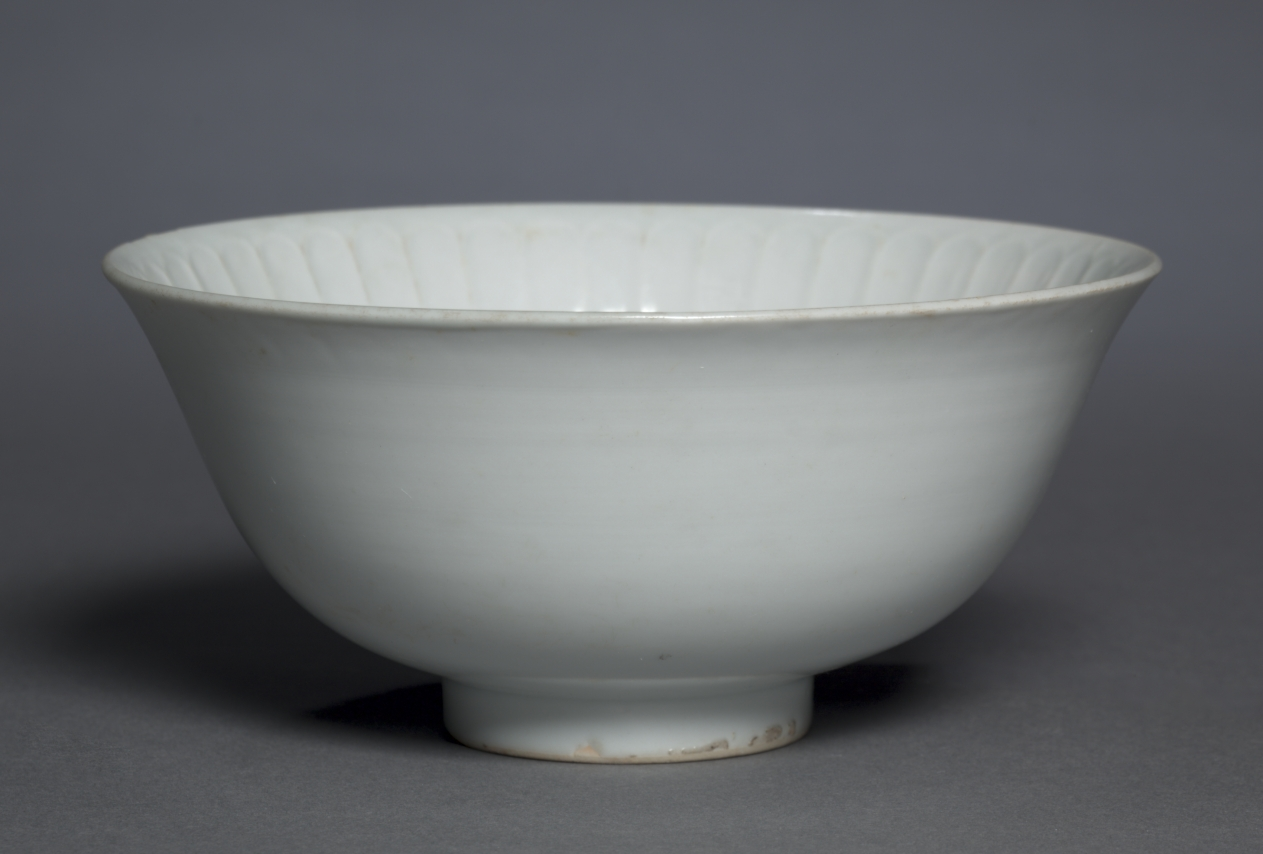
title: Bowl with Flower Petals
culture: China, Jiangxi Province, Jingdezhen, Yuan dynasty (1271–1368)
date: 1300s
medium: glazed porcelain with molded decoration, Shufu ware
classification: Ceramic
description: Yuan dynasty Shufu ware was a further development of the earlier qingbai ware and is characterized by a more heavily constructed body, opaque white glaze, molded decoration, and at times the inscription Shufu that gives the ware its name. Although lacking the inscription here, this bowl possesses the characteristics and decoration of Shufu pieces.